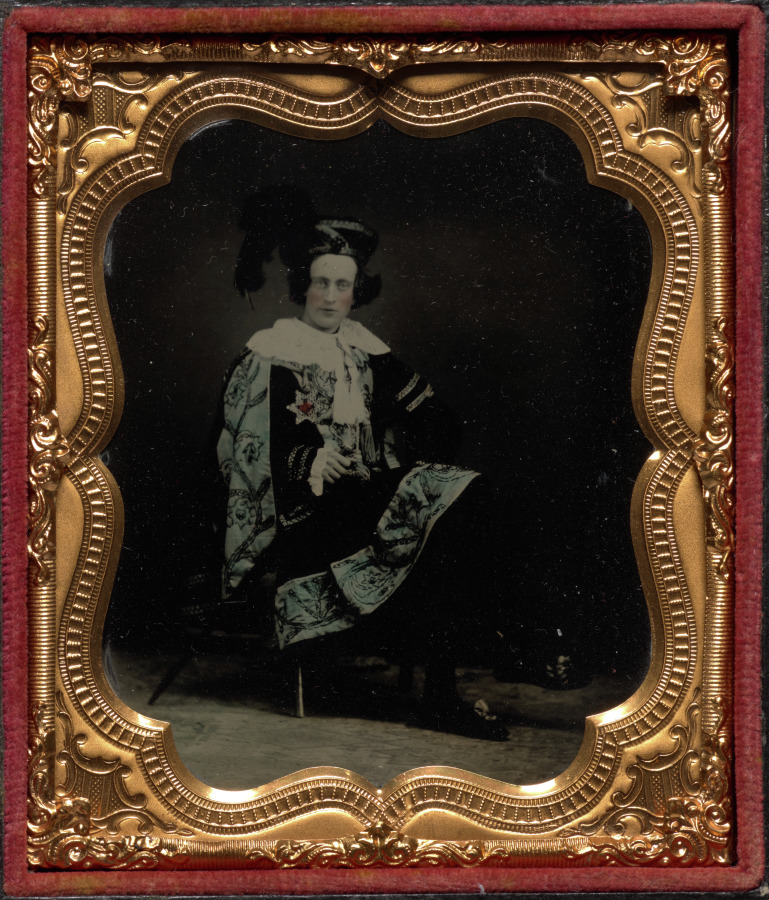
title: Shakespearean Actor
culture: America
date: c. 1858–1862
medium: ambrotype, tinted, sixth plate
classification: Photograph